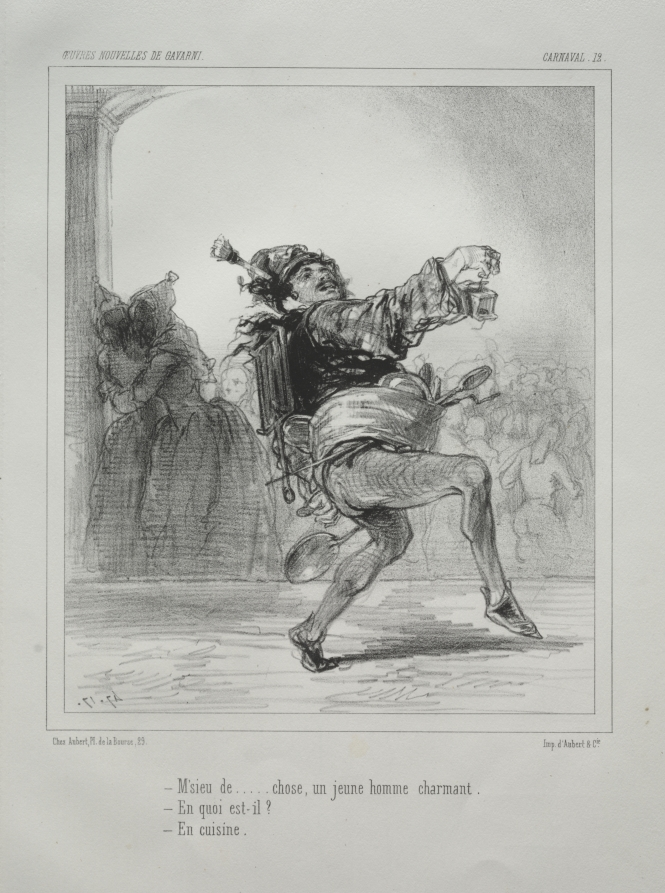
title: Carnaval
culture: France, 19th century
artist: Paul Gavarni (French, 1804–1866)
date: c. 1841–47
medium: lithograph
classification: Print